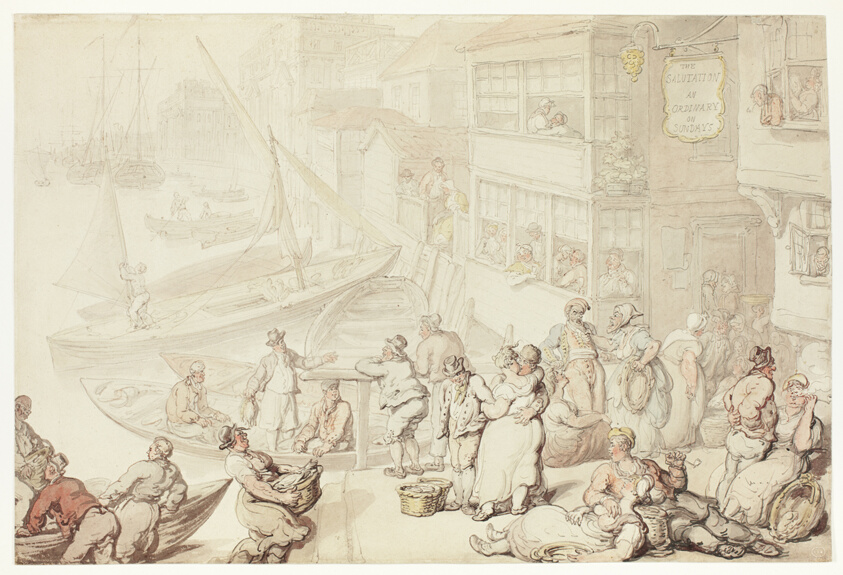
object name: Drawing and Watercolor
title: Outside the Salutation Inn, Greenwich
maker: Thomas Rowlandson (English, 1756-1827)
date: c. 1800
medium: Watercolor and pen and black ink and brush and black ink over graphite, on cream wove paper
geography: England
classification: watercolor; drawings (visual works); prints and drawing